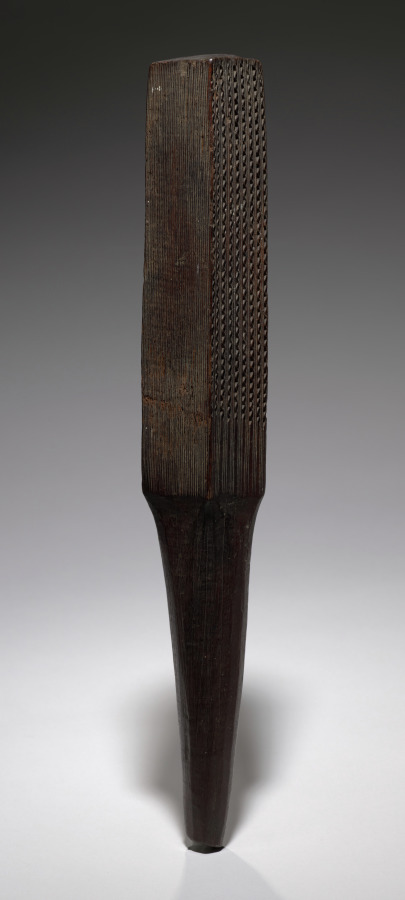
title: Tapa Cloth Beater (l'e kuku)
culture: Polynesia, Hawaii, 20th century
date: before 1930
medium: wood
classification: Sculpture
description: To make tapa, a decorated bark cloth, Hawaiian women used the four-sided beater to pound the inner bark of the paper mulberry tree, softened by a week of soaking in sea water. The cloth was beaten in several stages, starting with the most coarsely grooved side of the mallet and gradually reaching the finest grooved side. Although many Polynesian groups produced tapa cloth, only Hawaiian tapa cloth beaters were incised with a variety of "watermark" patterns. The prepared cloth was decorated with overlaying, cord snapping, free-hand painting, and printing techniques.